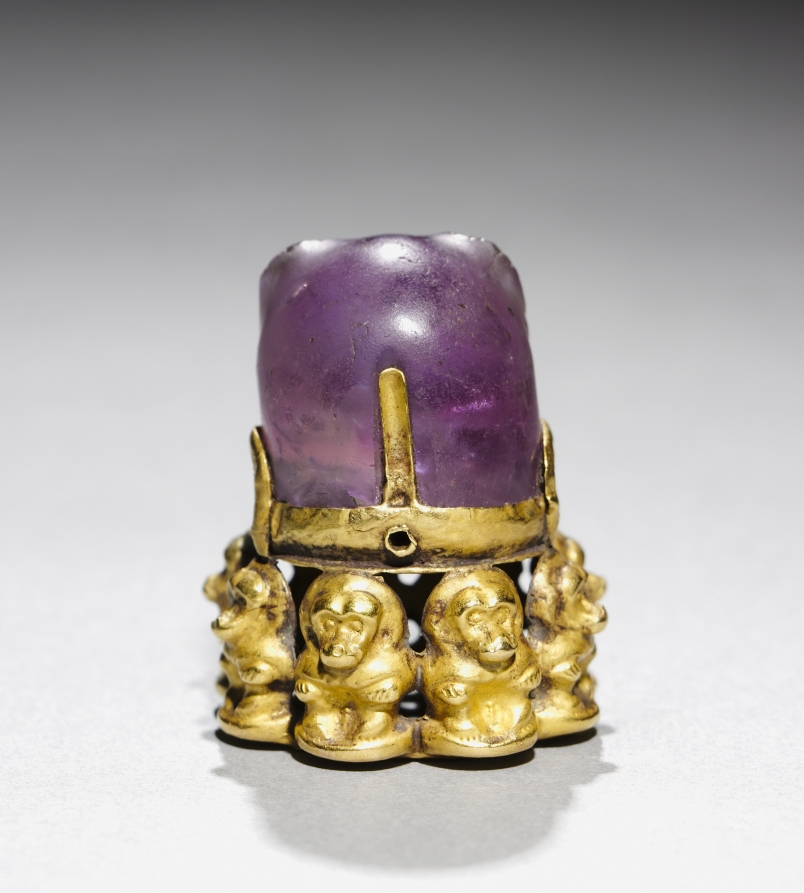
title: Pendant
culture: Sudan, Napatan; lion's head component: probably Egypt, Third Intermediate (1069–715 BCE), Dynasty 25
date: c. 700 BCE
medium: amethyst and gold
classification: Jewelry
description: This pendant consists of two parts: a superbly carved lion’s head in amethyst that has been set into a D-shaped gold base consisting of a platform surrounded by eight seated baboons. The lion’s head is an heirloom from the New Kingdom, most likely a gaming piece that had been adapted in the Napatan period to serve as an pendant amulet. This procedure was fairly common in antiquity as a means of recycling precious stones. The importance of leonine deities in Nubian religion was obviously the motivating force behind the creation of this spectacular ornament.